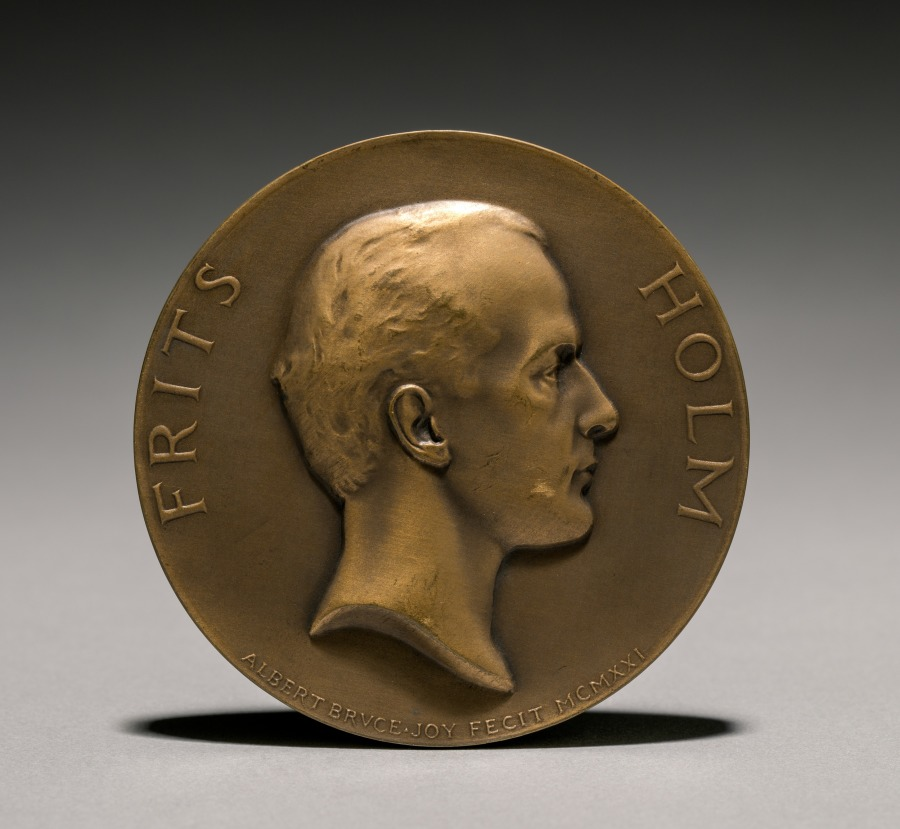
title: Medal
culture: England, 20th century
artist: Albert Bruce-Joy (British, 1842–1924)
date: 1921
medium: bronze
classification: Metalwork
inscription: Obverse: "FRITS HOLM ALBERT BRVCE.JOY FECIT MCMXXI." Reverse: "Den Holm Nestorianske expedition til Sian-fu Shensi N. V. Kina, MCMVII.VIII til Minde."